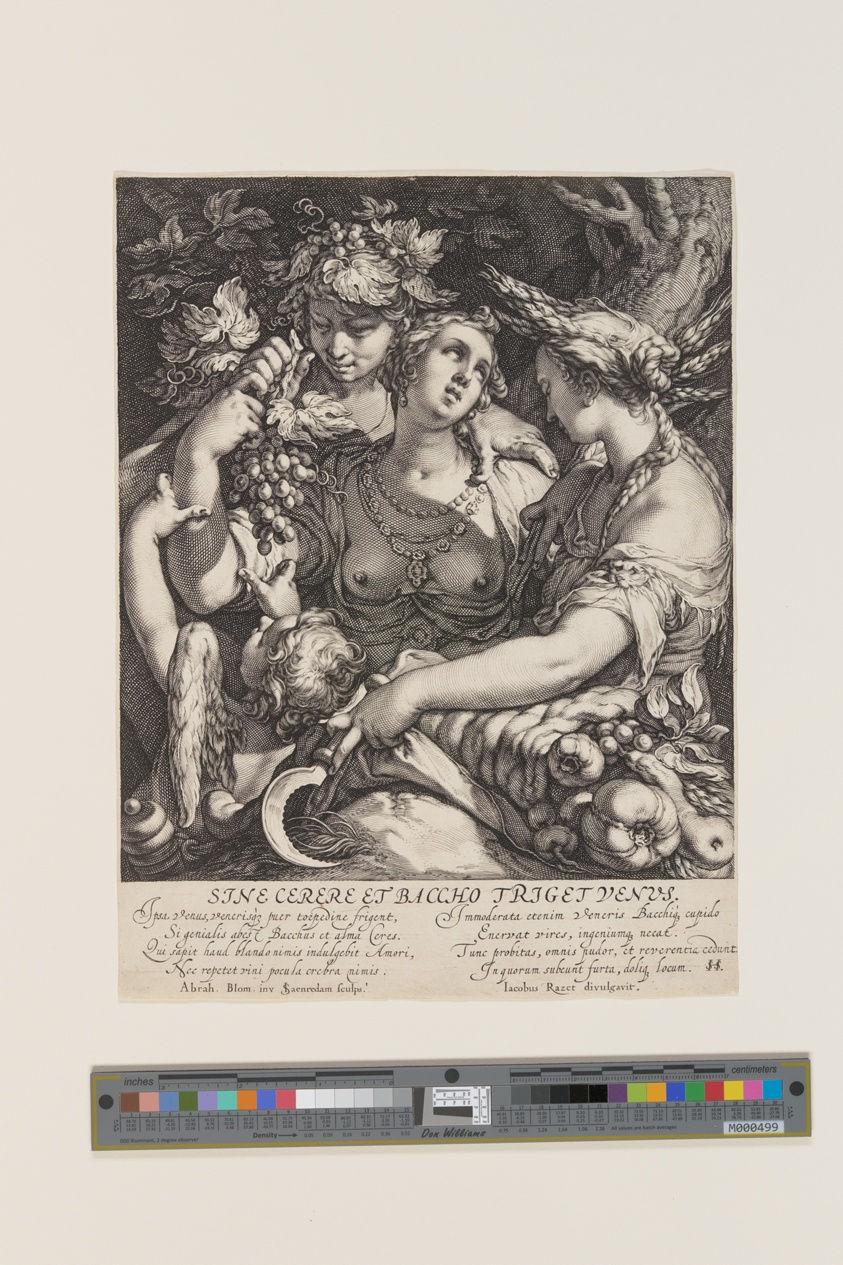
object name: Print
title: Sine Cerere et Baccho Friget Venus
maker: Jan Saenredam (Dutch, 1565–1607); after Abraham Bloemaert (Dutch, 1566–1651)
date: c. 1600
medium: Engraving on ivory laid paper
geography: Netherlands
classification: engraving; paper; print; prints and drawing